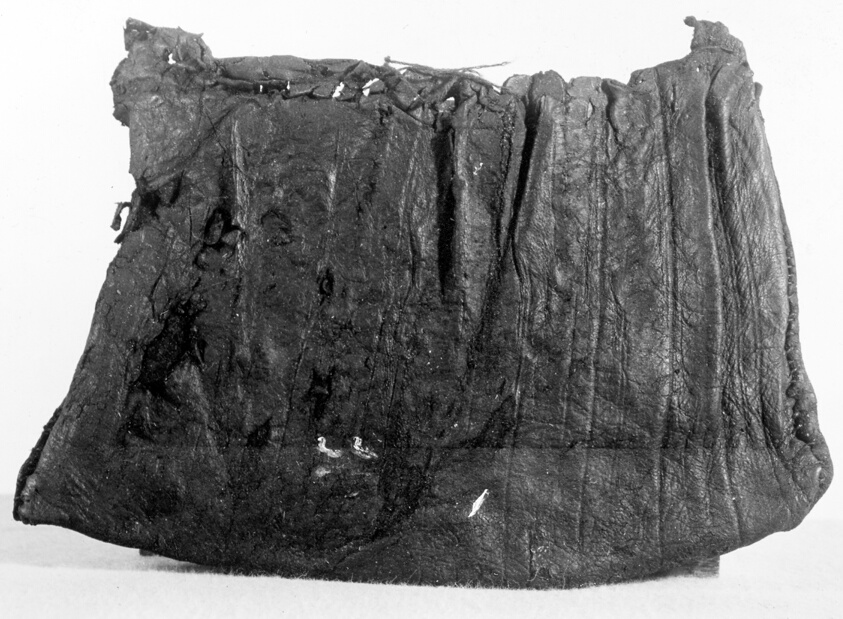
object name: Costume and Accessories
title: Bag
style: elizabethan, tudor, european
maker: England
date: 16th century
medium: Tooled leather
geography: England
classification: textile; costume accessory - bag; costume; dress (garment); clothing